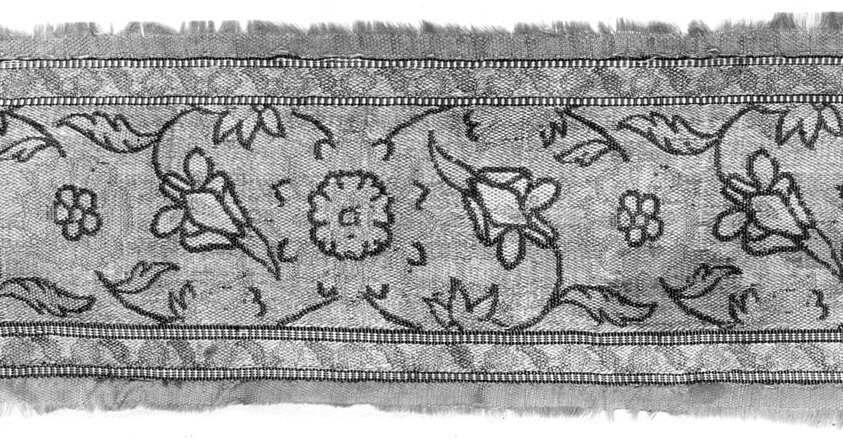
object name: Textile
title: Fragment (Border)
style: isfahan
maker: Iran (Persia, Isfahan)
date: 18th century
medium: Brocaded compound cloth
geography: Iran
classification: textile; weaving